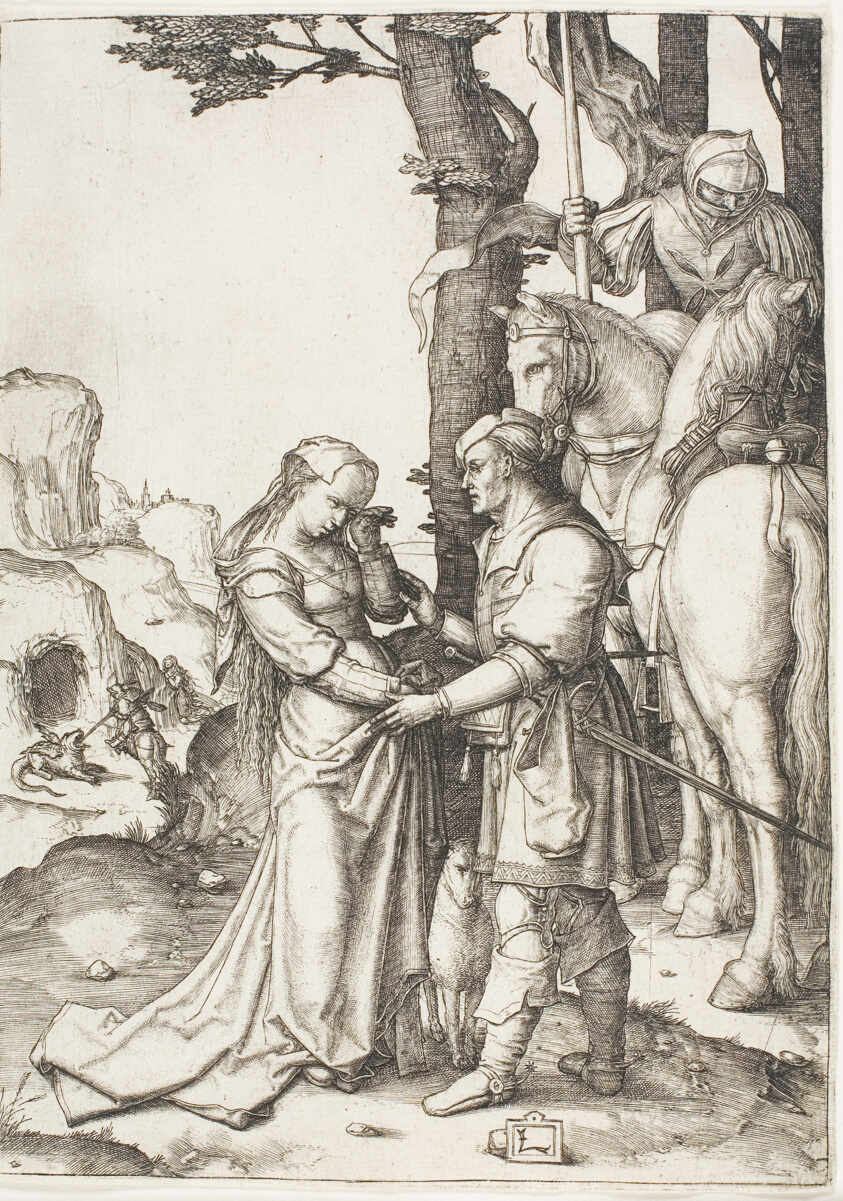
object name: Print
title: Saint George Liberating the Princess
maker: Lucas van Leyden (Netherlandish, c. 1494-1533)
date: c.1508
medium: Engraving in black on ivory laid paper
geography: Netherlands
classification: engraving; print; prints and drawing